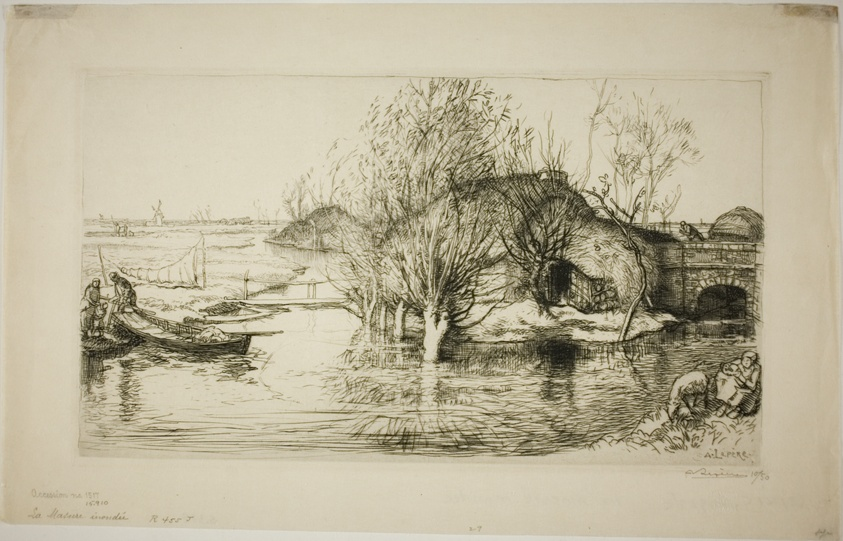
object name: Print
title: The Flooded Hovel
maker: Louis Auguste Lepère (French, 1849-1918)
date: 1910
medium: Etching on cream laid Japanese paper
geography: France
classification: etching; print; prints and drawing